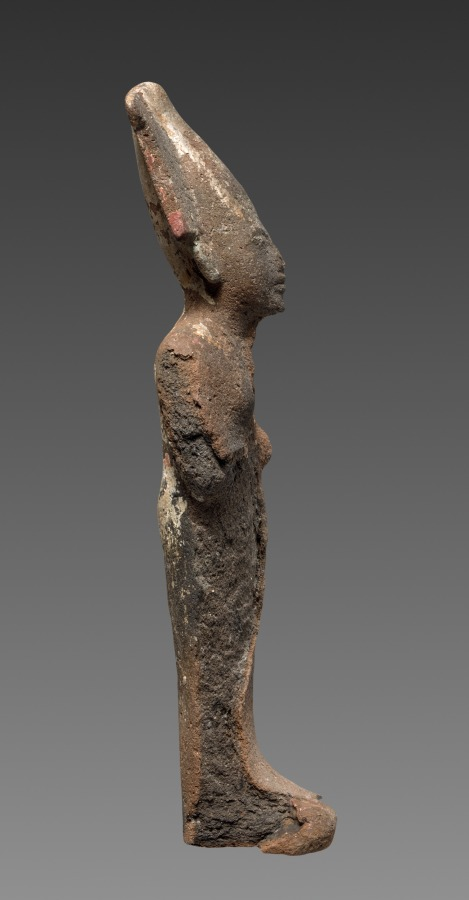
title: Statuette of Osiris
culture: Egypt, New Kingdom (1540–1069 BCE), Dynasties 19–20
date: 1295–1069 BCE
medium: painted terracotta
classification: Funerary Equipment